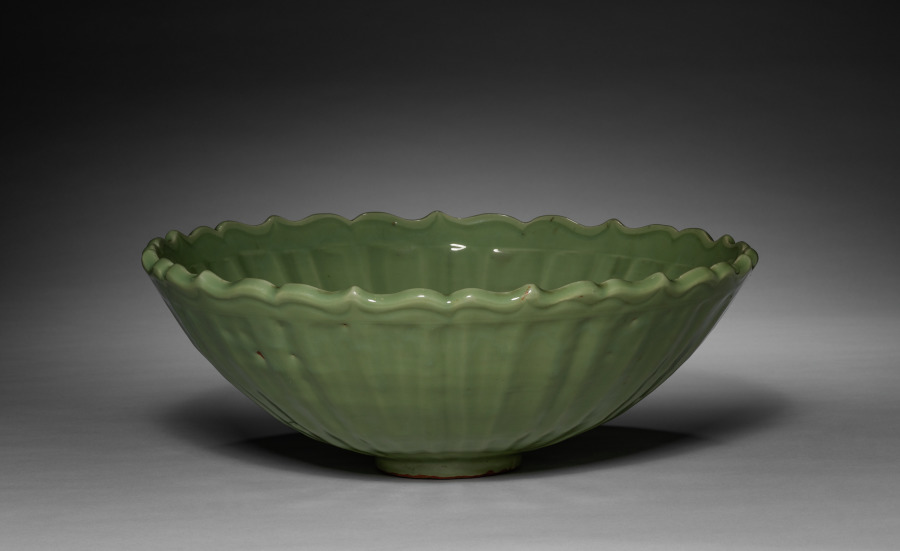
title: Large Bowl with Molded Decoration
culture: China, Zhejiang province, Longquan kilns, Ming dynasty (1368-1644)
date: 1300s–1400s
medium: Porcelaneous stoneware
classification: Ceramic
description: The lobed sides of this bowl open like a flower and rise to a solidly molded and pointed rim reminiscent of metalware. The bowl with a thick, shiny, jadelike green glaze was made by potters who mastered techniques to fire vessels of enormous sizes for the export market. Large bowls and plates were primarily shipped to the Middle East where they were used for banquets, in which food was traditionally offered in the center of a seated gathering.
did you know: Longquan celadon, or greenware, was often fired in dragon kilns, a type of narrow, sloped brick tunnel that could fire up to 25,000 pieces at a time.